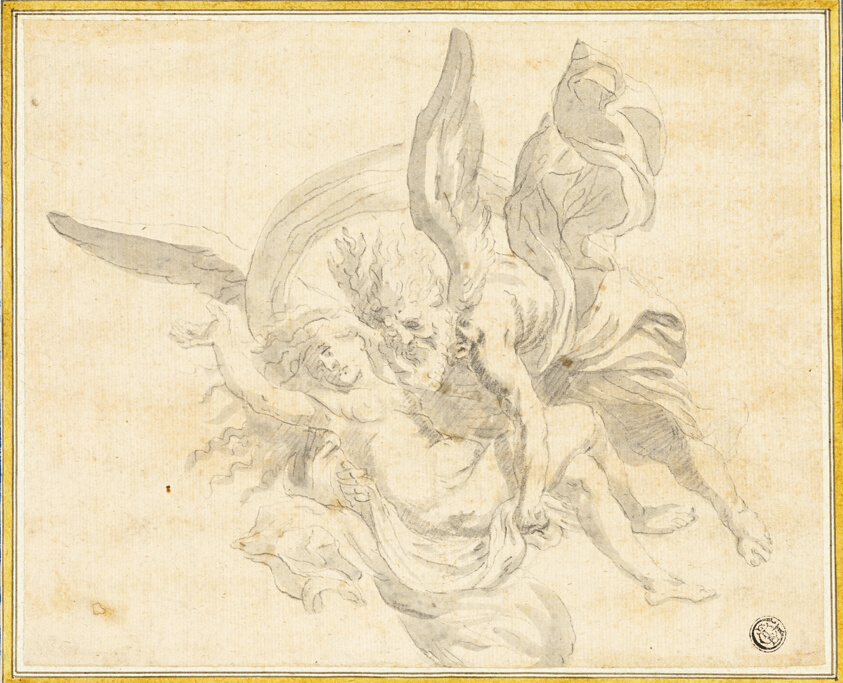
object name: Drawing and Watercolor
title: Boreas and Oreithyia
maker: Style of Giovanni Domenico Ferretti (Italian, 1692-1766); or possibly Jakob Philipp Weier (German, died 1789)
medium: Graphite and brush and gray wash, on buff laid paper, laid down on laid paper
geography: Italy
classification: ink or chalk wash; drawings (visual works); prints and drawing